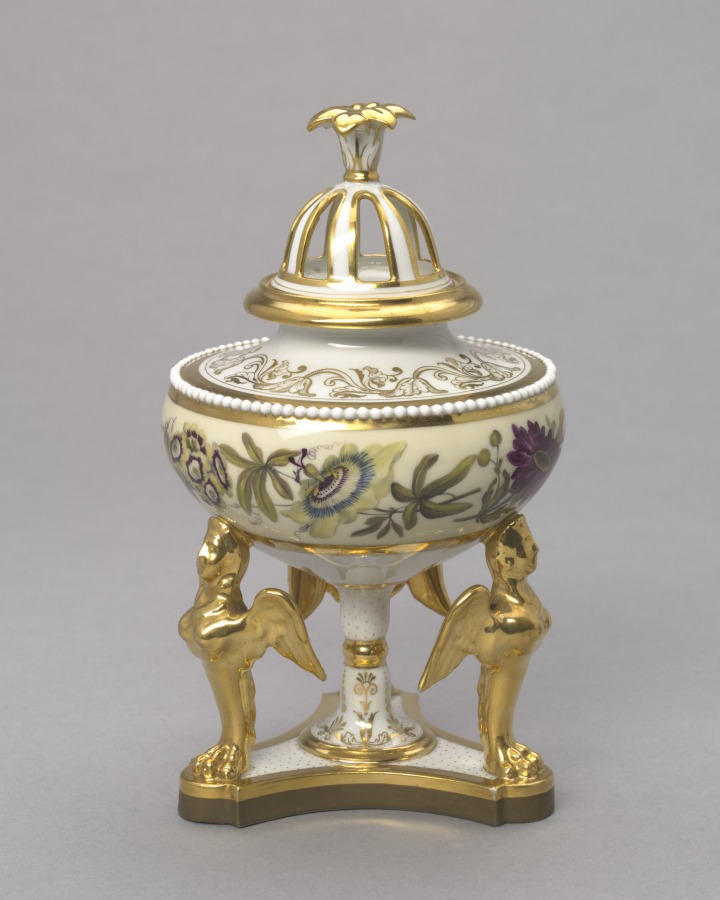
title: Urn and cover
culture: England, Worcester, 19th century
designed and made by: Flight, Barr and Barr (British)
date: c. 1815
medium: artificial porcelain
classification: Ceramic